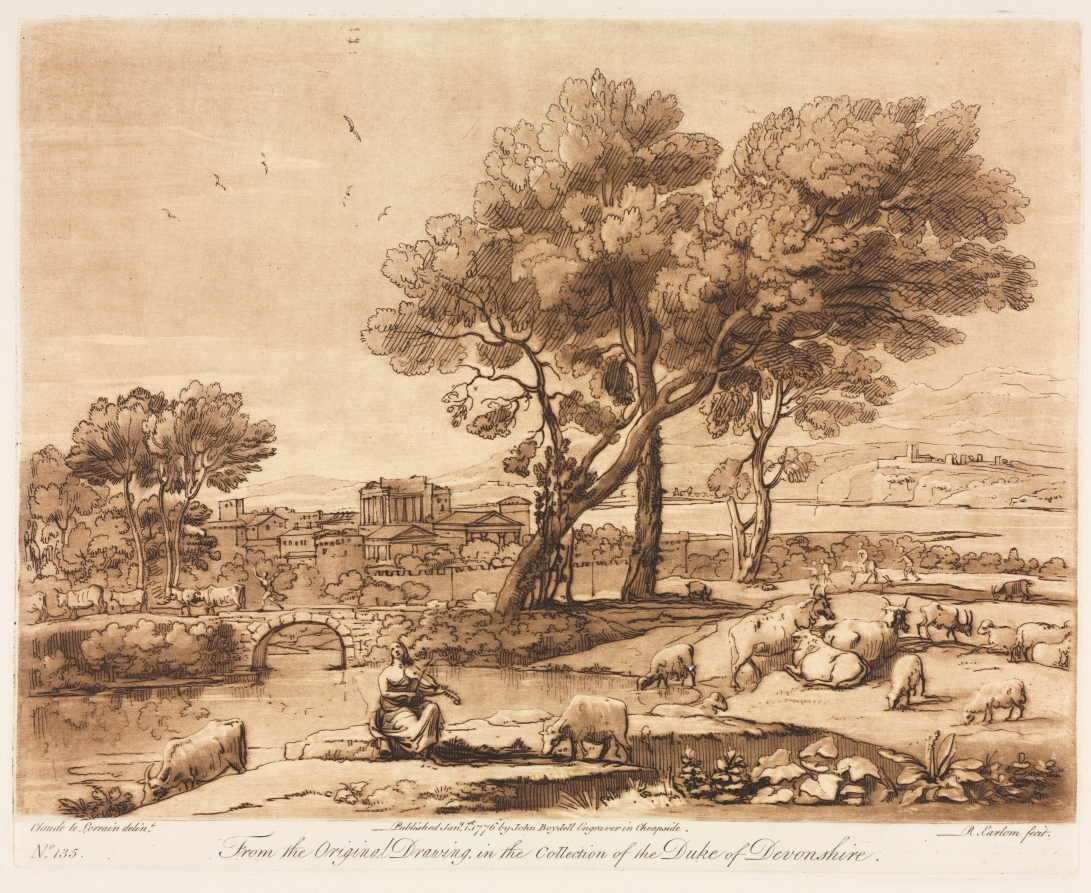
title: Liber Veritatis: No. 135, A Landscape, with Buildings, Mercury Stealing Admetuss' Cattle from Apollo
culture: England, 18th century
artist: Richard Earlom (British, 1743–1822)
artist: after Claude Lorrain (French, 1604–1682)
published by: John Boydell (British, 1720–1804)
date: 1776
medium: etching and mezzotint printed in brown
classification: Print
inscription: inscribed lower margin in plate: From the Original Drawing, in the collection of the Duke of Devonshire